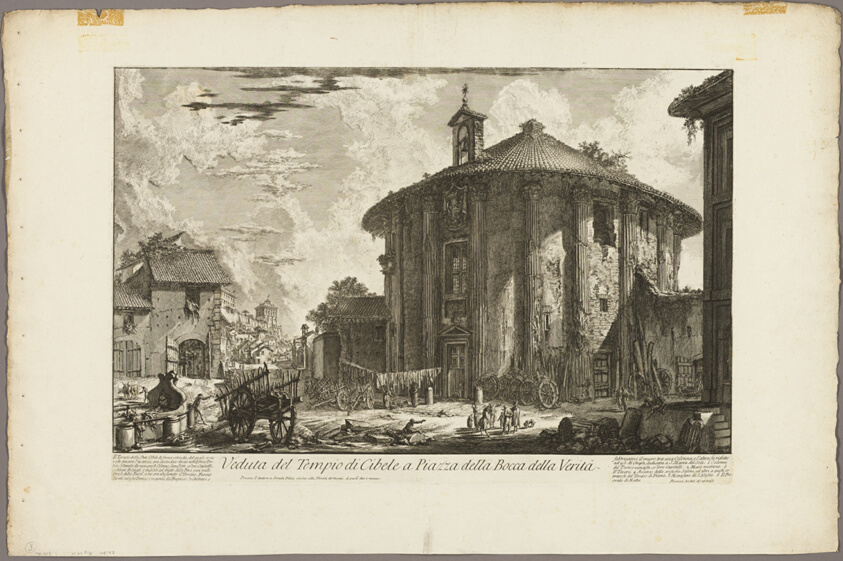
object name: Print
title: View of the Temple of Cybele in the Piazza of the Bocca della Verità, from Views of Rome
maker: Giovanni Battista Piranesi (Italian, 1720-1778)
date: 1750/59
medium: Etching on heavy ivory laid paper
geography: Italy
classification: etching; print; prints and drawing